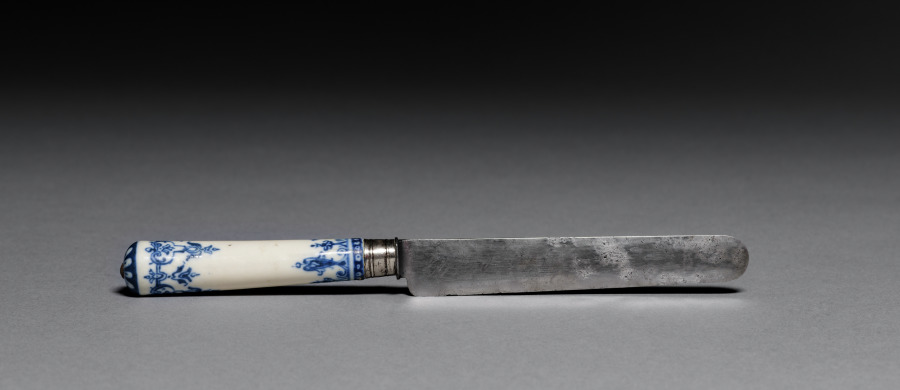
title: Knife Handle (manche de couteau)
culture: France, Saint Cloud, early 18th Century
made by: Saint Cloud Porcelain Factory (French)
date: c. 1710–1730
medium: soft-paste porcelain, steel blade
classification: Ceramic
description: Prior to the 18th century, personal flatware was produced in expensive materials as a luxury item that communicated wealth and status. Porcelain handles were introduced at the beginning of the 18th century, likely by the Saint-Cloud factory. This handle is decorated with a pattern in underglaze blue inspired by porcelain imported from China and has been fitted to a steel blade.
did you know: The Saint-Cloud porcelain factory was the first successful European manufacturer of soft-paste porcelain, a slightly off-white product that attempted to emulate the prized hard-paste porcelain produced by China and Japan.